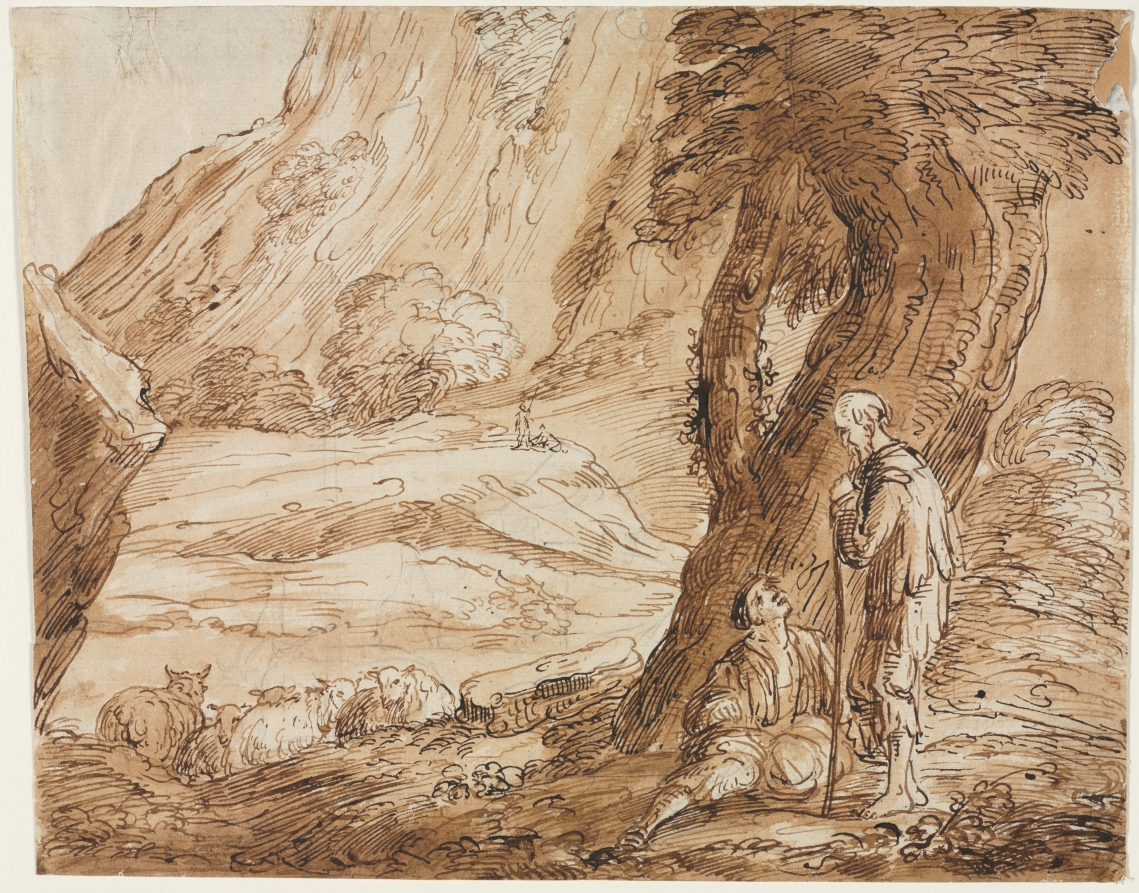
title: Landscape with Sheep and Two Shepherds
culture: England, 19th century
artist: Thomas Barker (British, 1769–1847)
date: first half 19th century?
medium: pen and brown ink and brush and brown wash with graphite; squared in graphite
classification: Drawing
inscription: VERSO, upper right, in graphite: 3 [illegible, erased] ; lower left, in graphite: 57 ; lower right, in graphite: Zuccarelli ; lower right, in graphite: 8 / [erased] ; lower right, in graphite: No. [2?]9